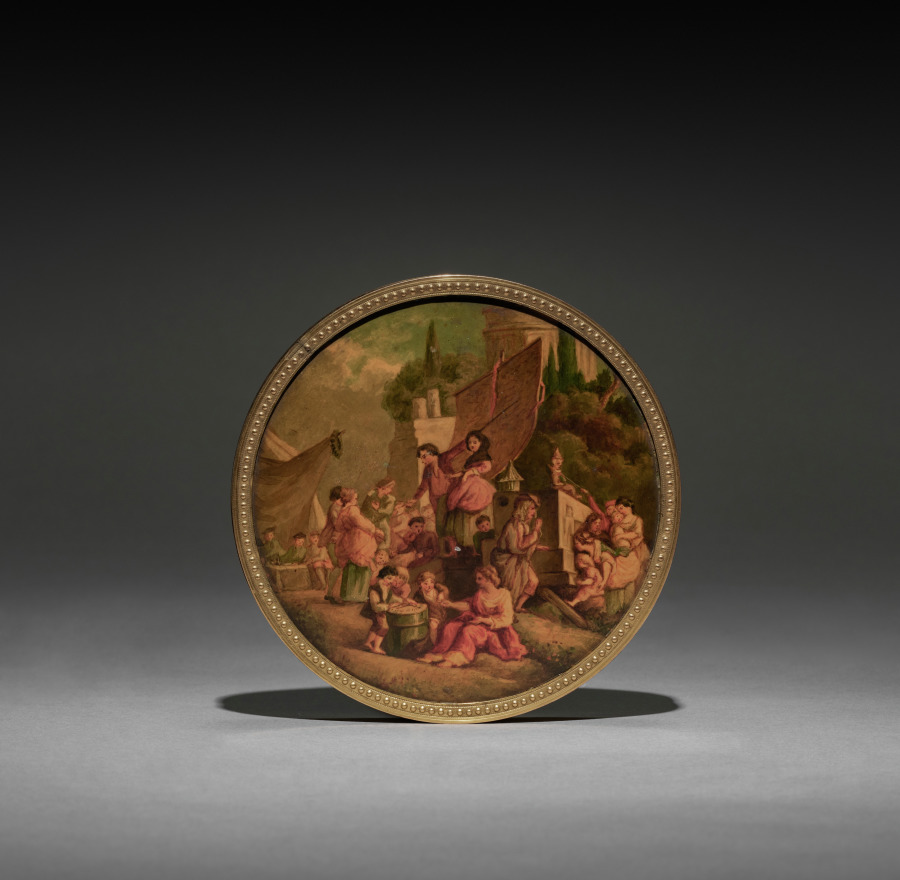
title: Cover for a Snuff Box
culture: France, 18th century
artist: after François Boucher (French, 1703–1770)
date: 1780–1800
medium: gold or gilt metal mounts; top with Vernis Martin style enameled decoration; sides and bottom enamel over gilt engine turned design; interior lined in tortoiseshell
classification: Miscellaneous